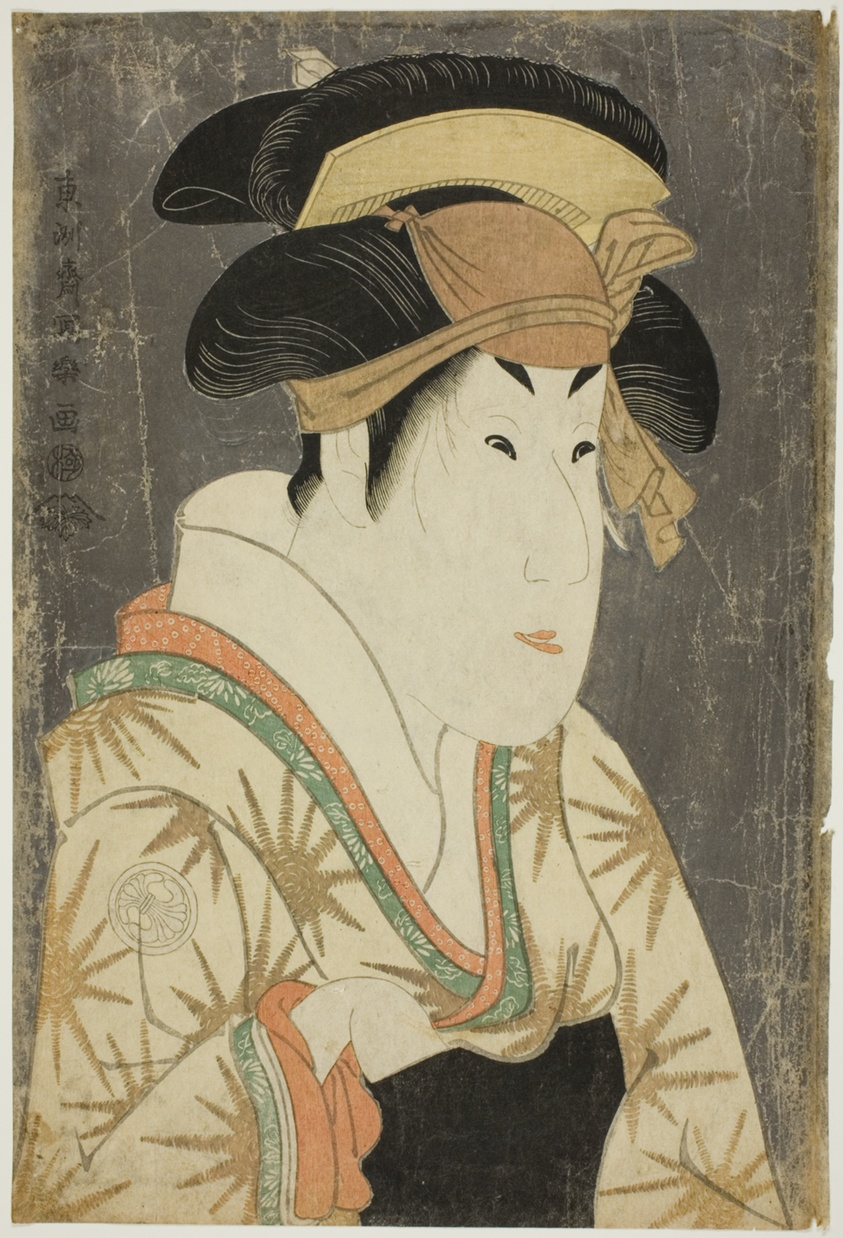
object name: Print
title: The actor Segawa Kikunojo III as Oshizu, wife of Tanabe Bunzo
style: Japanese (culture or style)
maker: Toshusai Sharaku 東洲斎 写楽; Japanese, active 1794-95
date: 1794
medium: Color woodblock print; oban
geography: Japan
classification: woodblock print; print; asian art